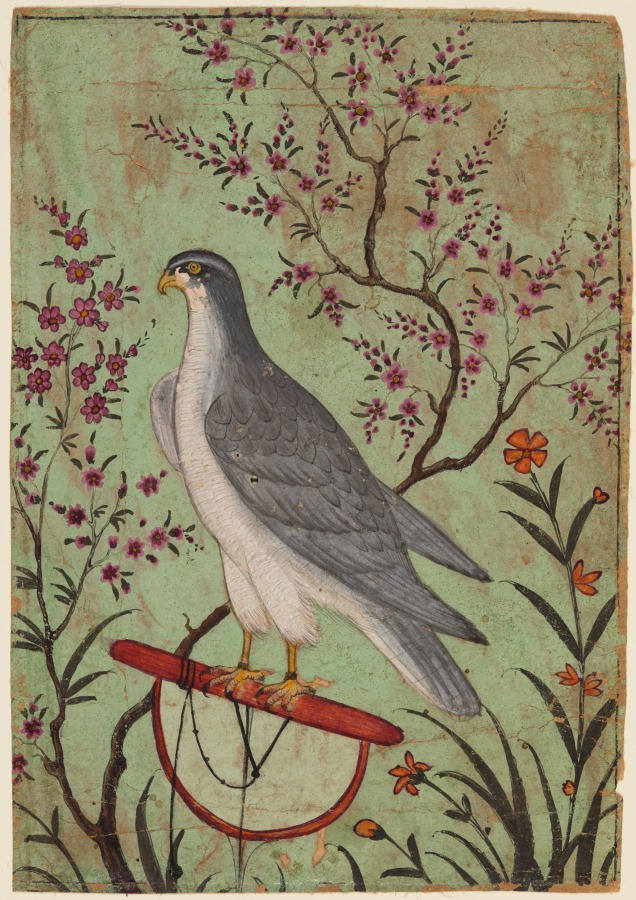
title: Falcon on a Perch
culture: Northwestern India, Rajasthan, Rajput Kingdom of Amber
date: c. 1610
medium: gum tempera on paper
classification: Painting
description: Falcons were prized participants in royal hunting expeditions, and this painting may be a portrait of a favorite bird or a gift from an ally. The bird faces left, and the talons are tied to the perch with a black string. The light green background, flowering trees, and plants provide dynamism to the composition and reveal the artist’s awareness of Persian, Mughal, or Deccani styles of painting.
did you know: A thin coat of malachite was applied for the background.